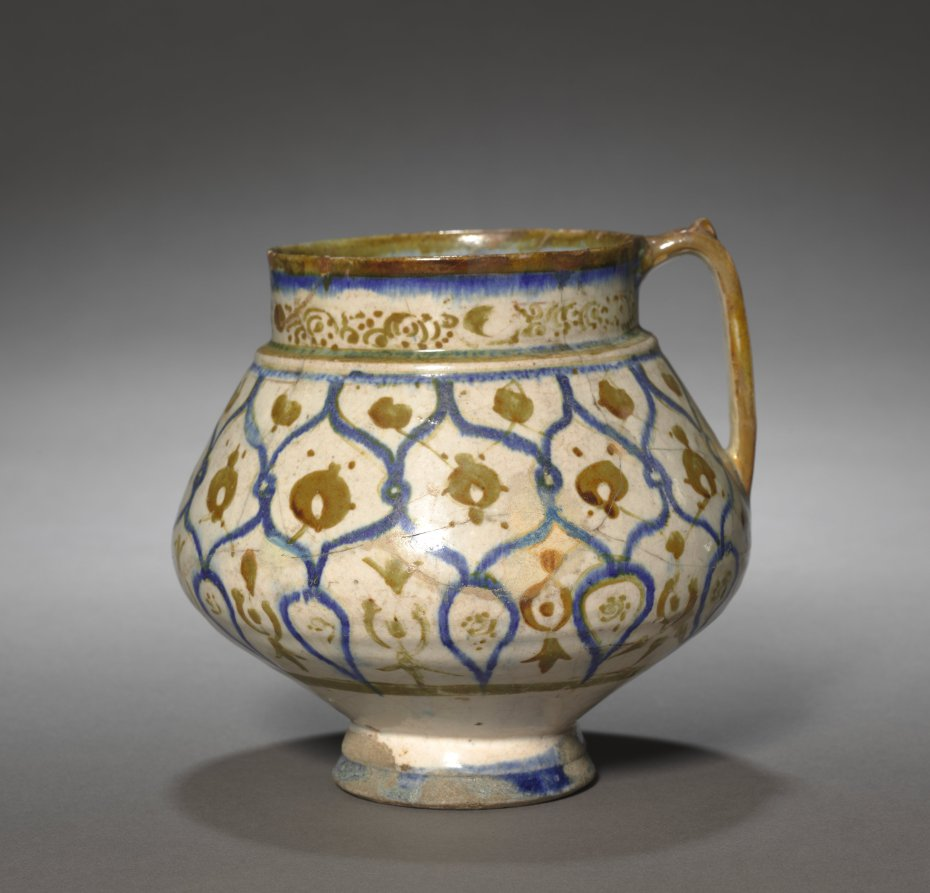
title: Jug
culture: Iran, Kashan, Seljuq period of Iran (1037–1194)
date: 1170–1220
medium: fritware with luster-painted design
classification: Ceramic